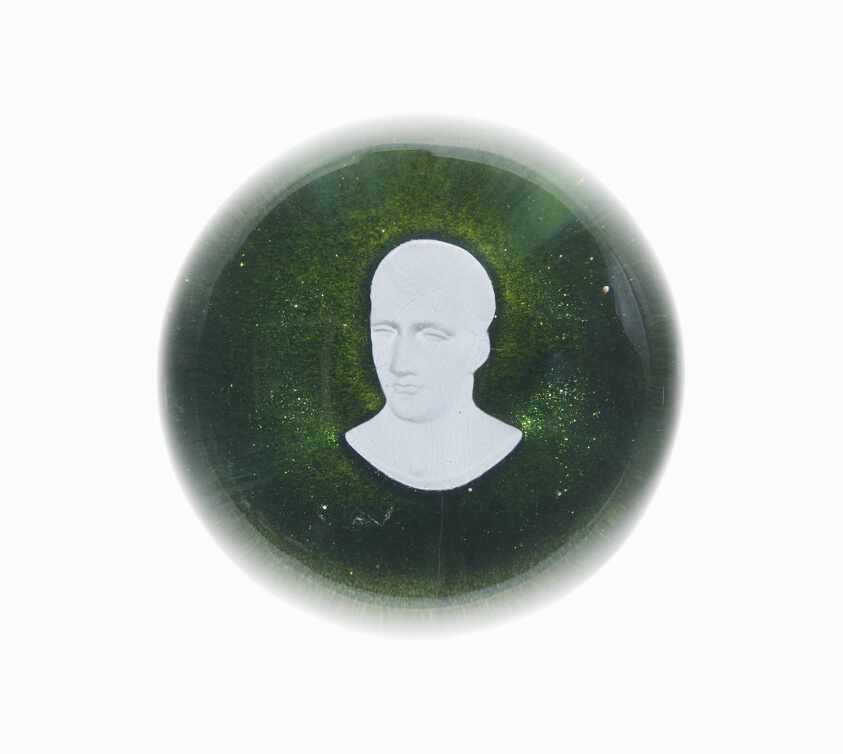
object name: Glass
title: Paperweight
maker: Saint-Louis Glassworks (Cristalleries de Saint-Louis); Lorraine, France, founded 1586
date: c. 1846–55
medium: Glass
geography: Saint-Louis-lès-Bitche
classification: paperweight; sulphide (glass); european decorative arts; glass